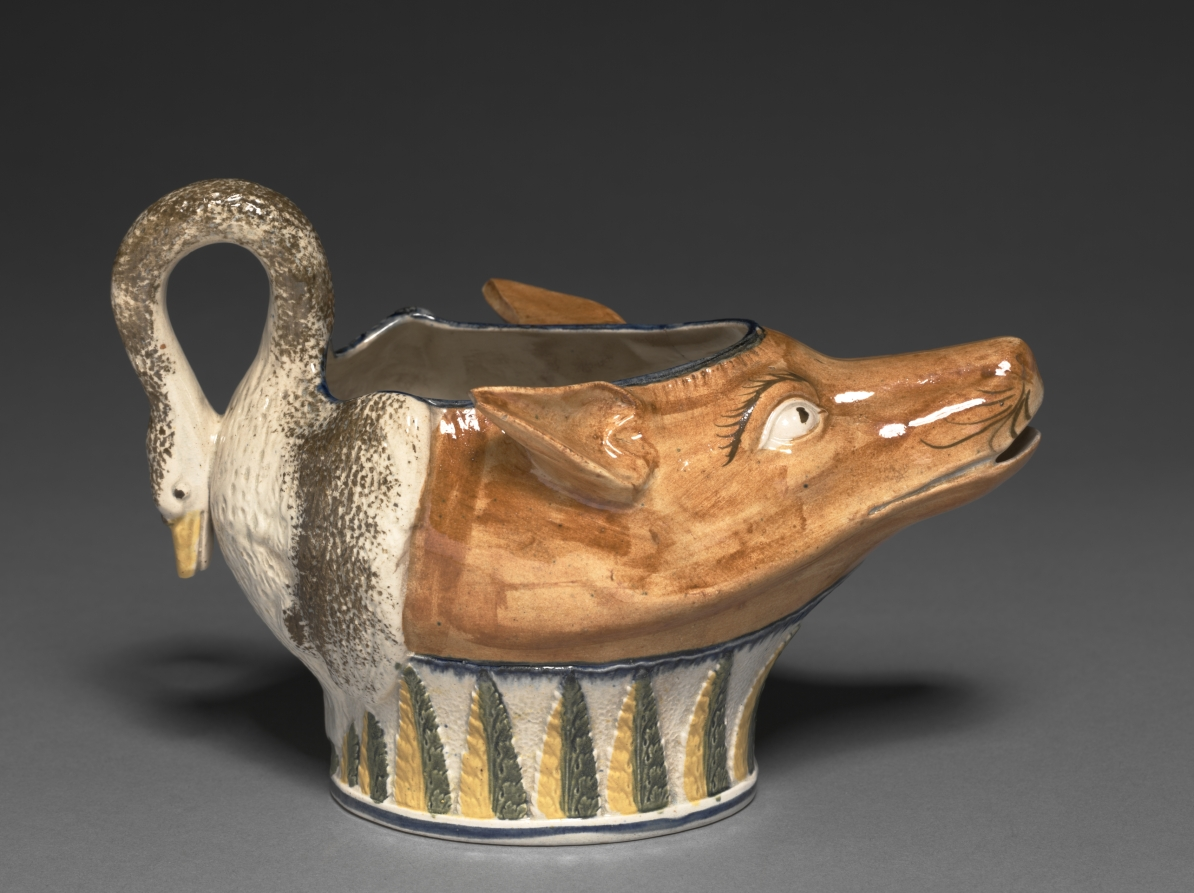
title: Fox and Swan Creamer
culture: England, Staffordshire, 18th century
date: c. 1800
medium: earthenware (Pratt ware)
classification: Ceramic